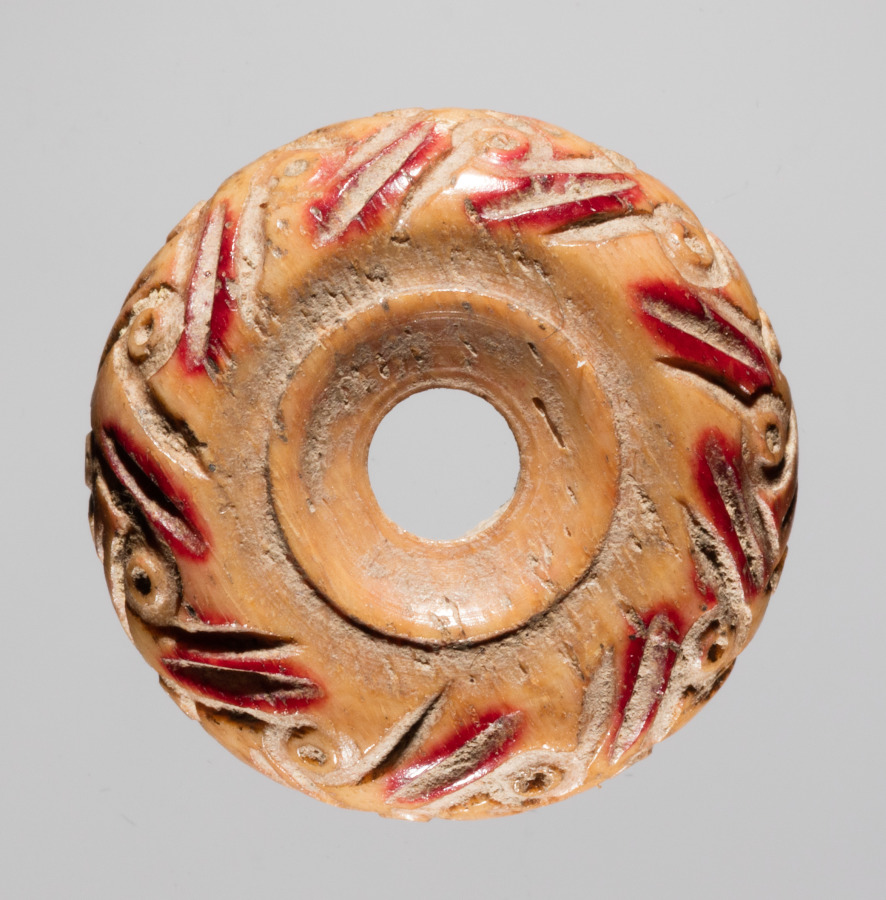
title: Spindle Whorl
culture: Iran, early Islamic period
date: 700s - 900s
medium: bone, incised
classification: Spindle Whorl